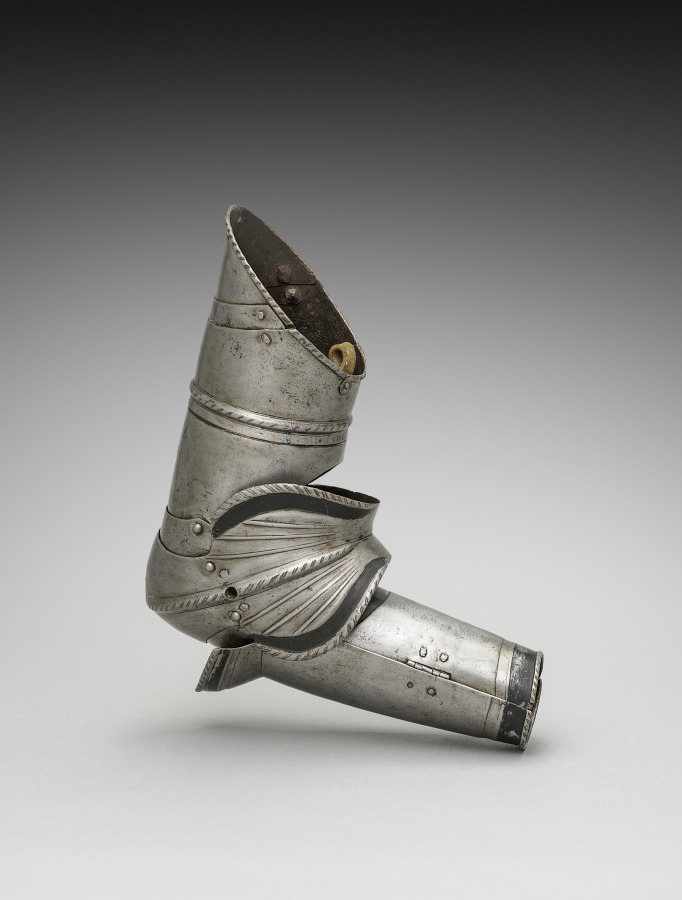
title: Right Vambrace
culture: Germany, 19th century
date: 1801–1900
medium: steel with black paint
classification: Arms and Armor